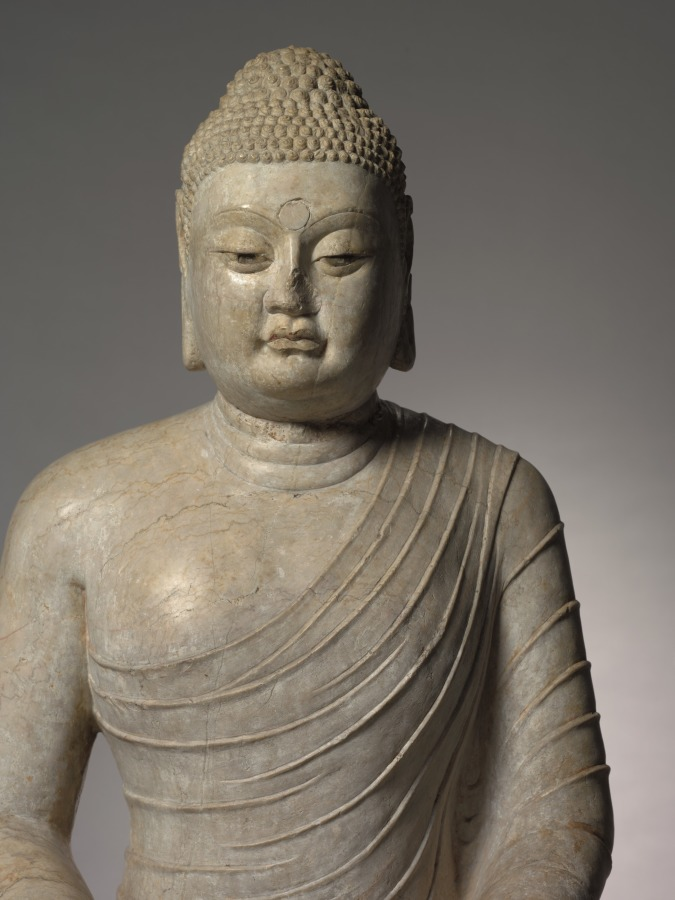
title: Seated Amitayus Buddha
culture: China, Northern Qi dynasty (550-577)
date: c. 570s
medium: marble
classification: Sculpture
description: Amitayus, the Buddha of Infinite Life, is seated in meditation on a double lotus pedestal. The pedestal was not made with the statue but the combination is faithful to the original artistic conception. The statue is an extremely rare example of a major type of Northern Qi Buddhist sculpture. The heavy, massive front highlights the sense of monumentality and the spiritual essence of the Buddha. Today the sculpture is united with a pedestal that exhibits the rich, ornate style of early Tang sculpture. It was commissioned by the Duke of Liang, Fang Xuanling (578–648), for the blessing of his second son and daughter-in-law, the Tang imperial princess of Gaoyang. The iconography and inscription suggest that it originally went with a statue, now missing, of Shakyamuni, the historical Buddha, instead of Amitayus.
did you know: The stringlike folds of the Buddha's draperies emphasize his monumental, rigidly erect torso and tubular limbs.